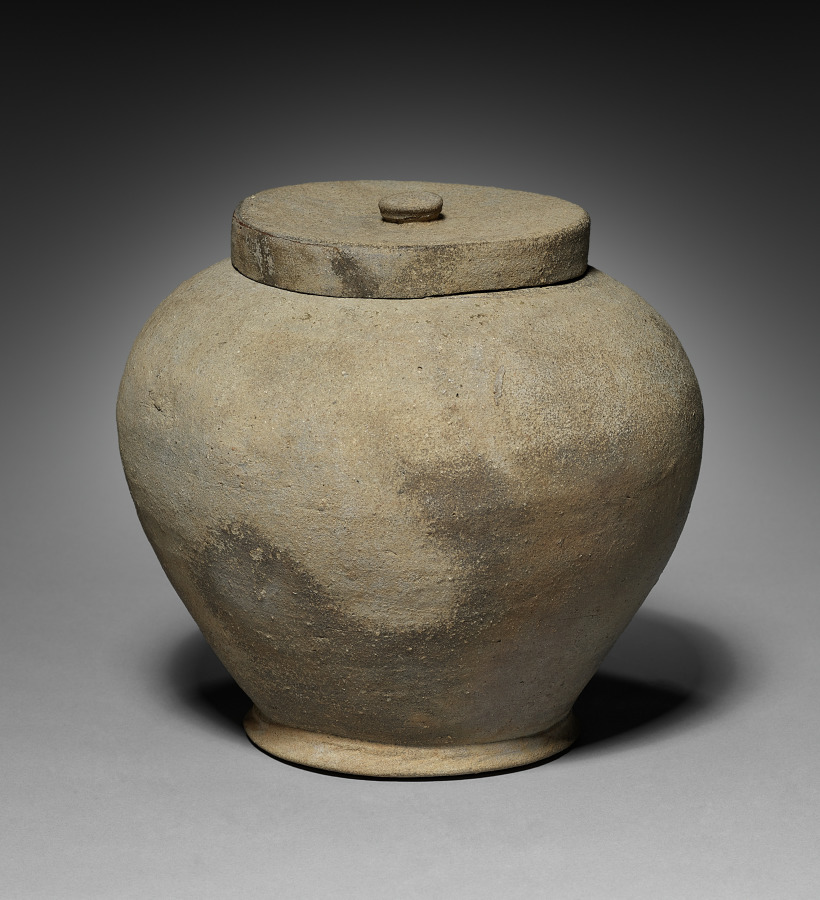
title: Cinerary Urn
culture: Japan, Heian period (794–1185)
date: c. 800–850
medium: stoneware with slight natural ash glaze (Sue ware)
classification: Ceramic